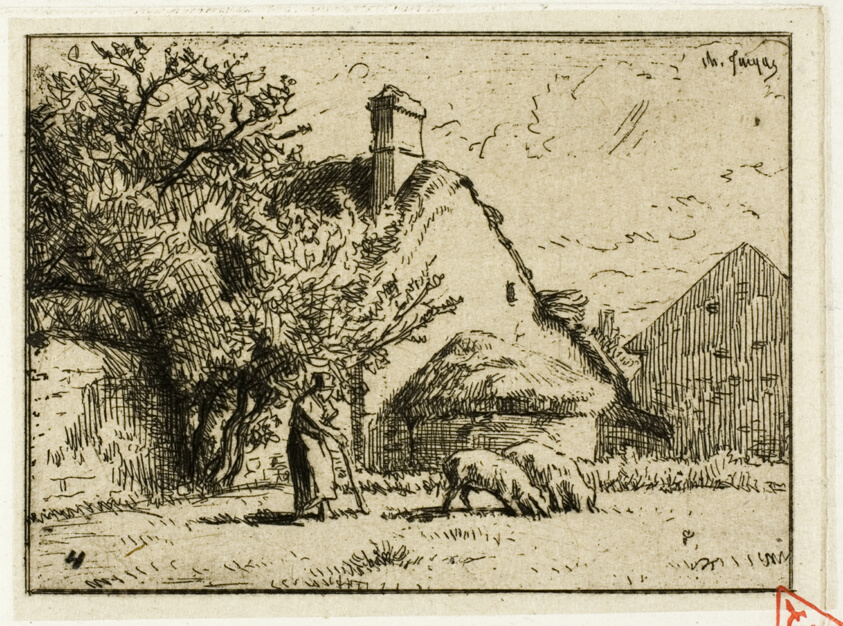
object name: Print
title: Woman Tending Two Pigs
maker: Charles Émile Jacque (French, 1813-1894)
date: 1849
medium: Etching on cream China paper laid down on white wove paper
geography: France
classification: etching; print; prints and drawing